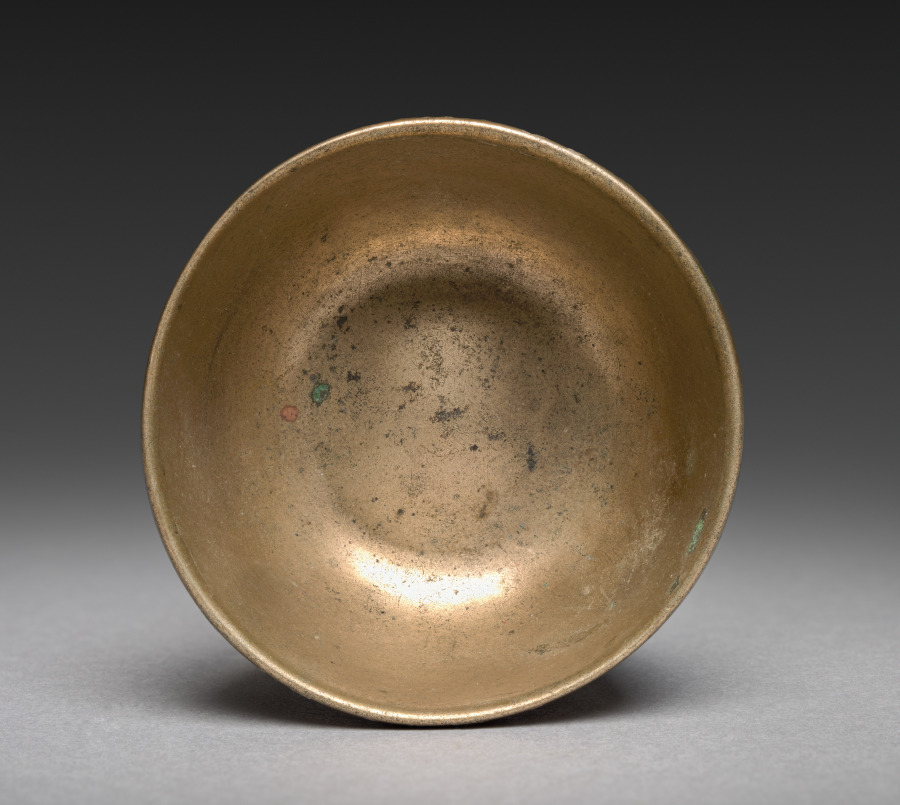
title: Wine Cup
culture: North Korea, Yochon, unassigned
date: unassigned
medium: brass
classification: Metalwork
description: In ancestor veneration rituals, deceased parents or ancestors are sanctified as spirits who are believed to oversee their descendants. Three times a year, once at the lunar new year, once at the person’s death date, and once at the time of the mid-autumn festival, food would be placed on the table for the ancestors, including fruits, rice, meat, and rice wine. During these ceremonies the worshipers’ attitude was as reverential toward the objects meant to embody the ancestors’ spirits as that toward a living parent. This pair of brass cups may have been used for ancestral rituals to contain rice wine.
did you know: This pair of bronze cups may have been used in family rituals such as ancestral worship ceremonies.